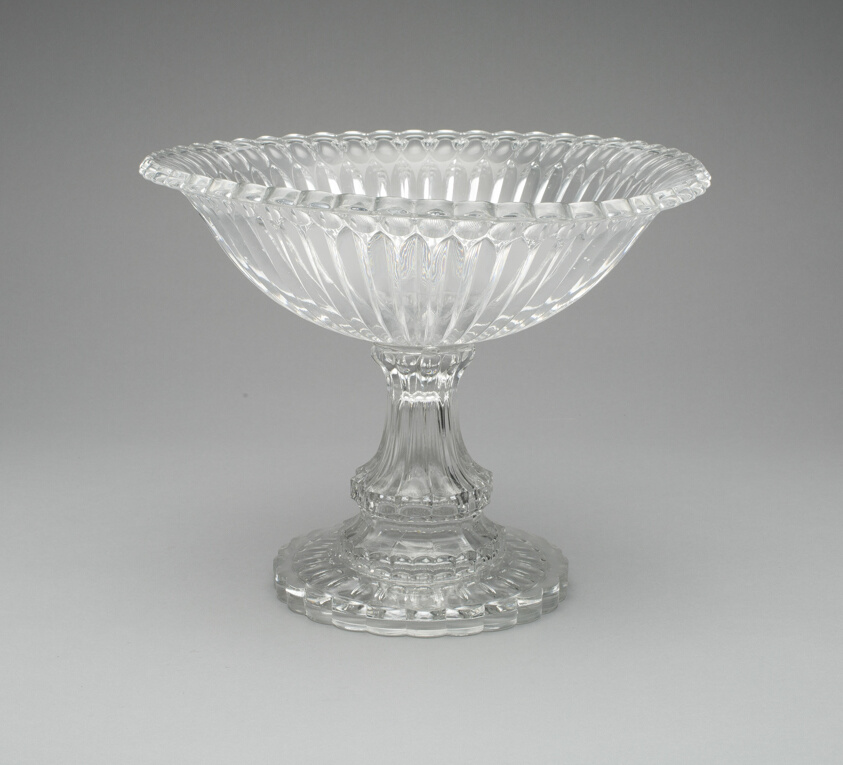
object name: Glass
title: Compote in "Thumbprint" pattern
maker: Artist unknown (American, 19th century); Pittsburgh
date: 1850–60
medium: Pressed glass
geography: Pittsburgh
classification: compote; glass; vessel for serving food; american decorative arts; american arts; decorative arts